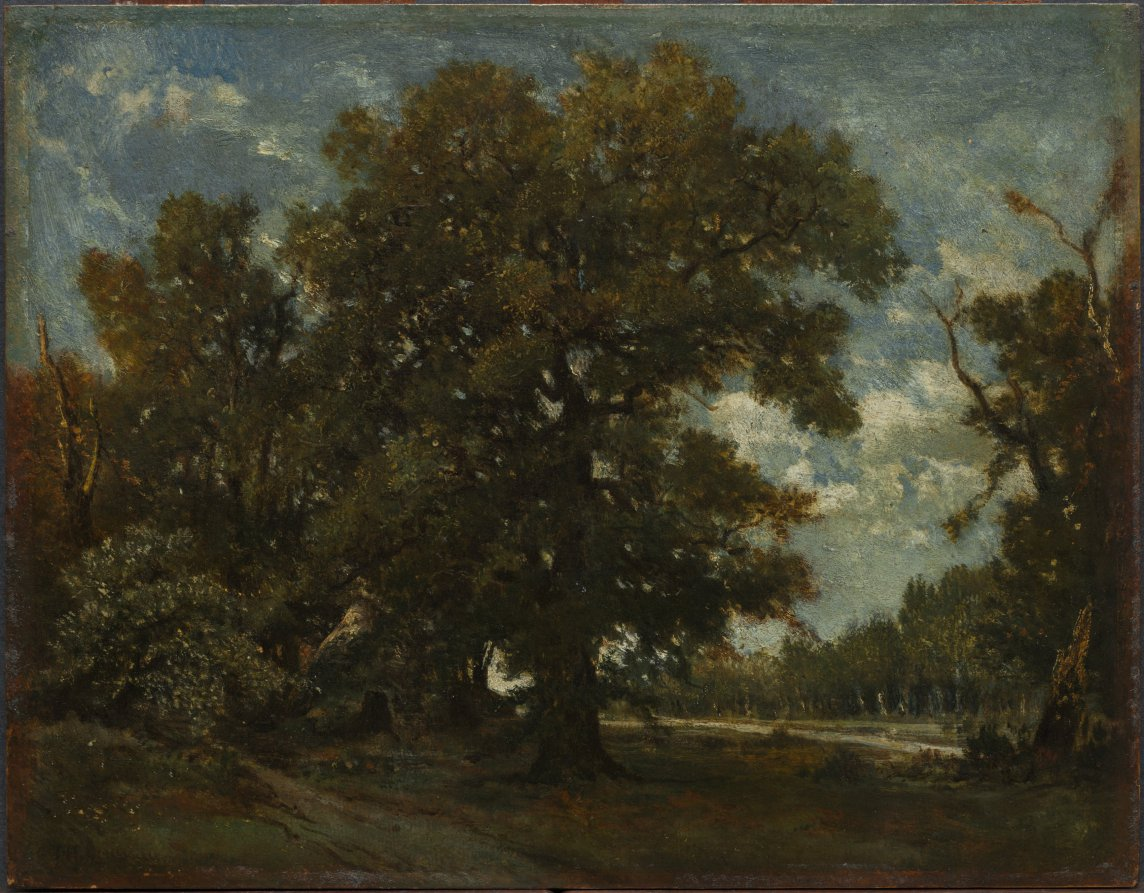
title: The Oak Tree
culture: France, 19th century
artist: imitator of Théodore Rousseau (French, 1812–1867)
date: 19th century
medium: oil on paper mounted on wood panel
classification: Painting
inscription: Signed lower left: TH. Rousseau